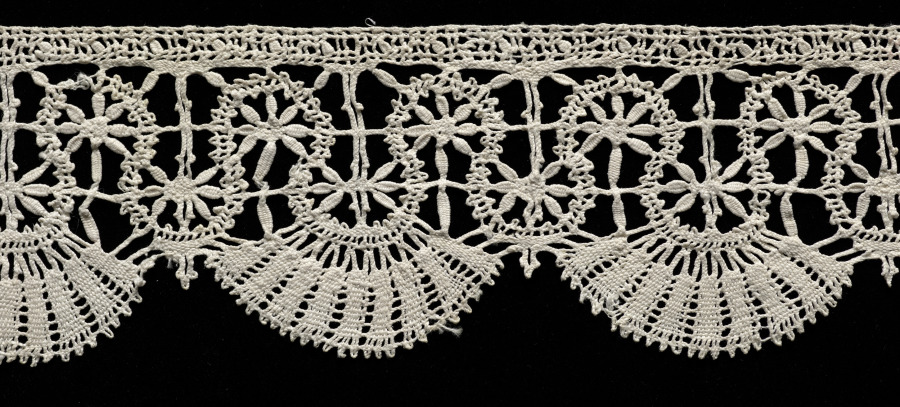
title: Lace Edging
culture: Italy, Genoa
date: 1600s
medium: Bobbin lace (needle lace, rose lace design)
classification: Lace